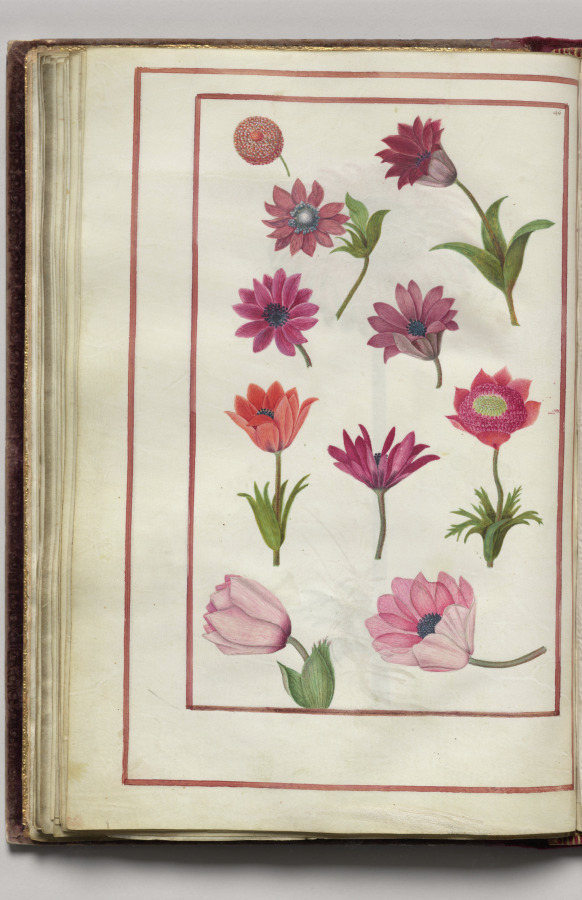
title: Red and Pink Anemones, folio 23 (verso), from Florilegium (A Book of Flower Studies)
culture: France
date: 1608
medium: watercolor, ink, silver, and gold over occasional traces of pencil, on vellum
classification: Bound Volume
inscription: Dated: Poitiers 1608 (on frontispiece) Signed: On frontispiece in black ink, lower right: Van Kuyk Notation on drawing: Frontispiece: in pencil, lower margin: * élève de Van Kessel, peintre flammand (* in pencil also appears in front of Van Kuyk's name).